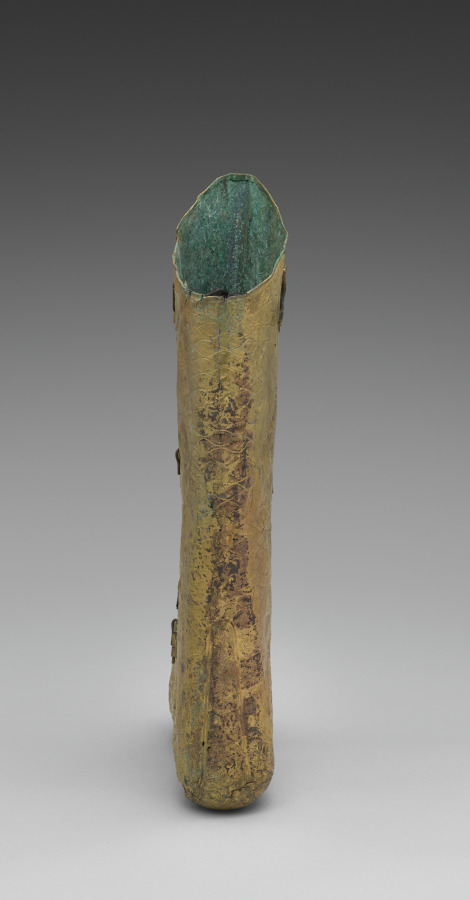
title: Gilt-bronze Boot, One of a Pair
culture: Northern China, Liao dynasty (907-1125)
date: 907–1125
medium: Gilt-bronze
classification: Metalwork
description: Bronze and silver-gilt boots, modeled after textile and leather boots, were found in Liao tombs. A pair of silver-gilt boots (dated 1018 or earlier) with phoenix motifs and cloud scrolls, were excavated from the tomb of Princess Chen and Xiao Shaoju in Inner Mongolia at Qinglongshan town in Naiman Banner; the couple’s faces were covered with gold masks. This gilt-bronze boot shows rising dragons chasing pearls and may have been made for a male tomb occupant.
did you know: The boot's dragon motif suggests that the wearer was a male princely member of the ruling family.